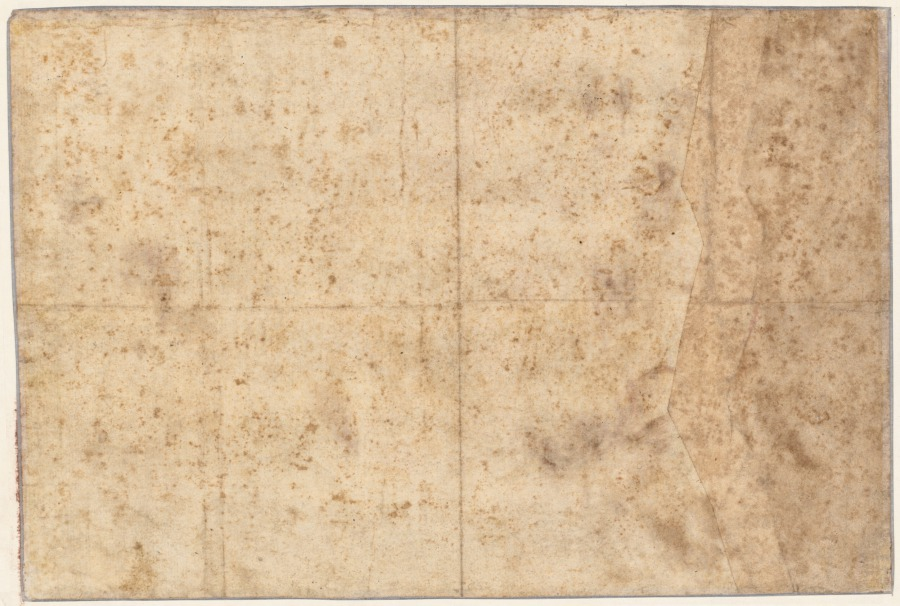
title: The Flaying of Marsyas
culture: Netherlands, 16th - 17th century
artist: Jan van der Straet, called Johannes Stradanus (Netherlandish, active Italy, 1523–1605)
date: c. 1570–1605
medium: Pen and brown ink and brown and red washes, heightened with white paint (or gouache), on paper prepared with red washes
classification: Drawing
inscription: Inscribed LR in pen and ink “Strada. / STRADENSIS”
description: In this gruesome mythological scene, Apollo begins to flay, or peel the skin off, the satyr Marsyas as punishment for his arrogant challenge in a musical contest. The surrounding Olympian gods show reactions ranging from horror to fascination. The artist Johannes Stradanus helped found the Accademia delle Arti del Disegno (Academy of the Arts of Drawing) in Florence in 1563, which instituted a course of training for artists that included observing a human dissection. In making this image, Stradanus very likely understood the flaying of Marsyas as a metaphor for the importance of dissection and anatomical study to the artist.